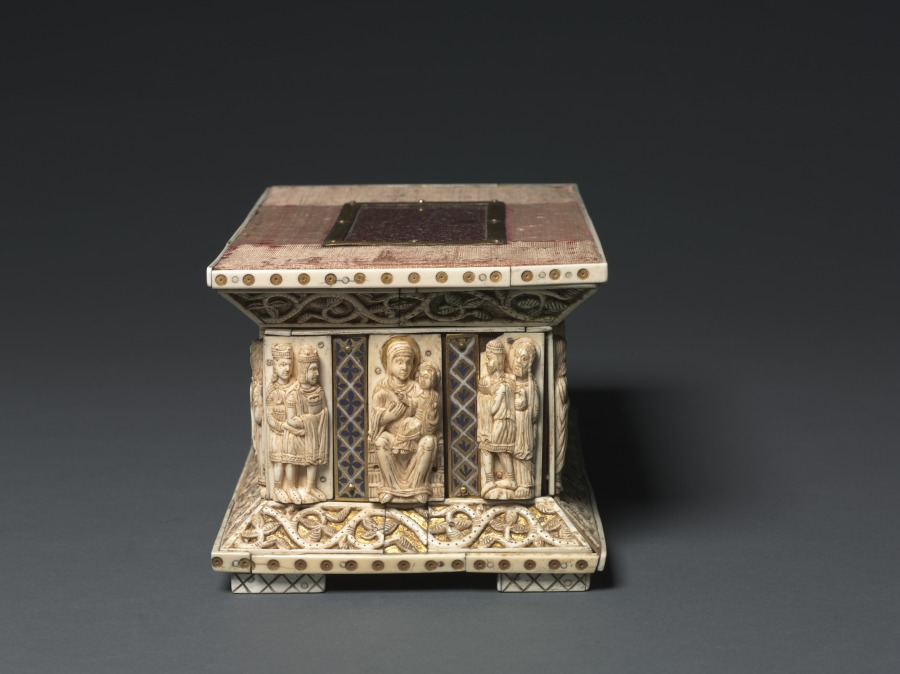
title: Portable Altar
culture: Germany, Cologne, Gothic Period, 13th century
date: c. 1200–1220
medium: walrus ivory, gilded copper, porphyry, champlevé enamel, wood core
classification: Ivory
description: The principal decoration of this portable altar is carved of walrus ivory. On the long sides are traditional figures of standing apostles. On the short sides are the seated Virgin with the Magi, and Christ the Judge between the symbols of the Evangelists. The commercial ties between the Rhineland and the Norse peninsula made walrus ivory easily available to the city of Cologne, one of the most important artistic centers in medieval Germany.